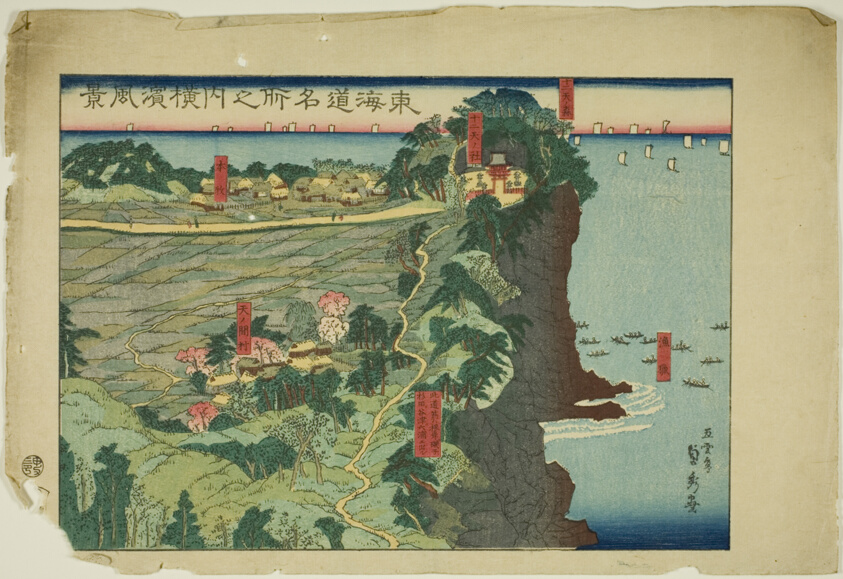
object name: Print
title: View of Yokohama (Yokohama fukei), from the series "Famous Places along the Tokaido (Tokaido meisho no uchi)"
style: Japanese (culture or style)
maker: Utagawa Sadahide (Japanese, 1807-1873)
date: 1860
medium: Color woodblock print; oban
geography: Japan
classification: print; asian art